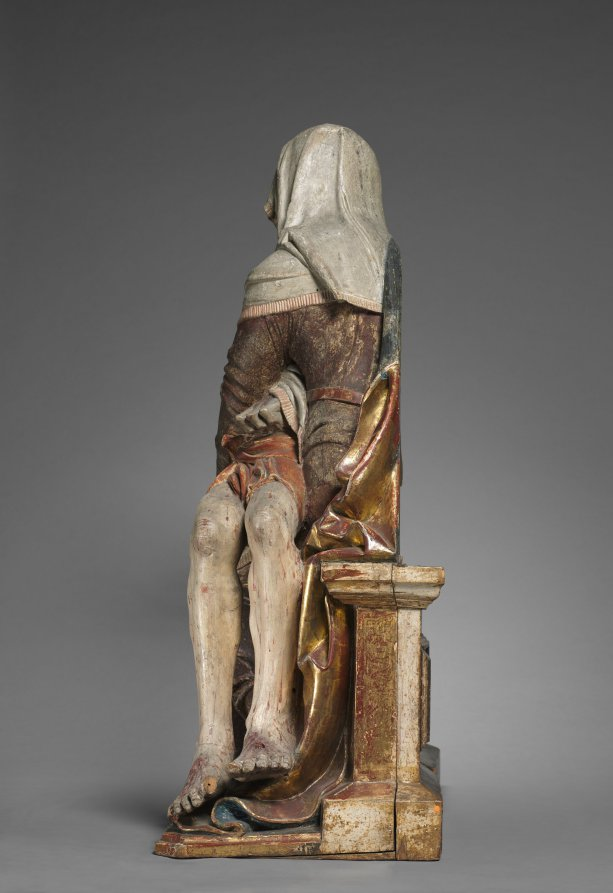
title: Vesperbild (Pietà)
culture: Germany, Upper Bavaria, 16th century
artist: Master of Rabenden (German)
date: c. 1515–20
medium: lindenwood, polychromed and gilded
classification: Sculpture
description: Depicting the Virgin cradling Christ’s dead body, works like this one were known in German as vesperbilds, owing to their incorporation into the liturgy of the evening prayer (vespers) on Good Friday. The word pietà—from the Latin pietas, meaning "piety" or "compassion"—was also used to describe such works. Like other devotional image types that emerged in southern Germany in the later medieval period, vesperbilds encouraged viewers to contemplate Christ’s suffering and empathize with the Virgin’s sorrows more directly and emotively than ever before. This anonymous German artist is named after one of his most important works, the high altar of the church of Rabenden in the Chiemgau, the foothills of the Alps. The sculpture was likely placed in a secondary chapel in a Bavarian church.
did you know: This sculpture sensitively depicts the Virgin cradling the body of Christ. This devotional image was likely placed near the altar in a German chapel. Imagine standing in a small, quiet chapel looking up at these lifelike figures with flickering candles casting dappled light onto their surface.